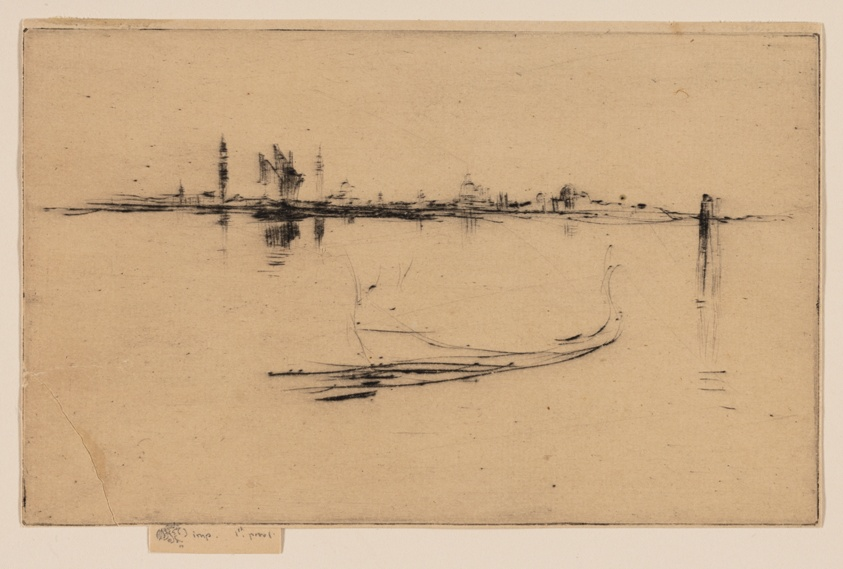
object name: Print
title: Islands: Evening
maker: James McNeill Whistler (American, 1834-1903)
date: 1879/80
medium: Drypoint in black ink on cream laid paper laid down on cream wove paper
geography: United States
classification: drypoint; print; prints and drawing; paper